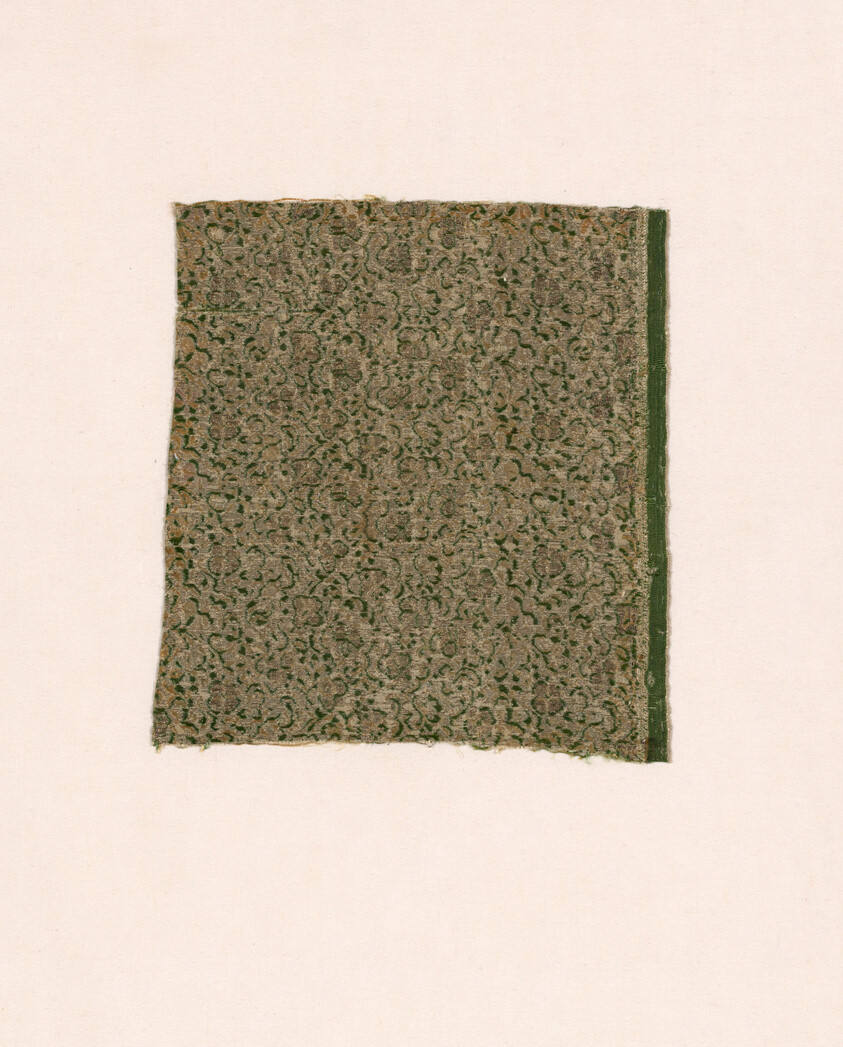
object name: Textile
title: Fragment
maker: France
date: 1701/25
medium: brocaded silk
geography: France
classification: textile; weaving